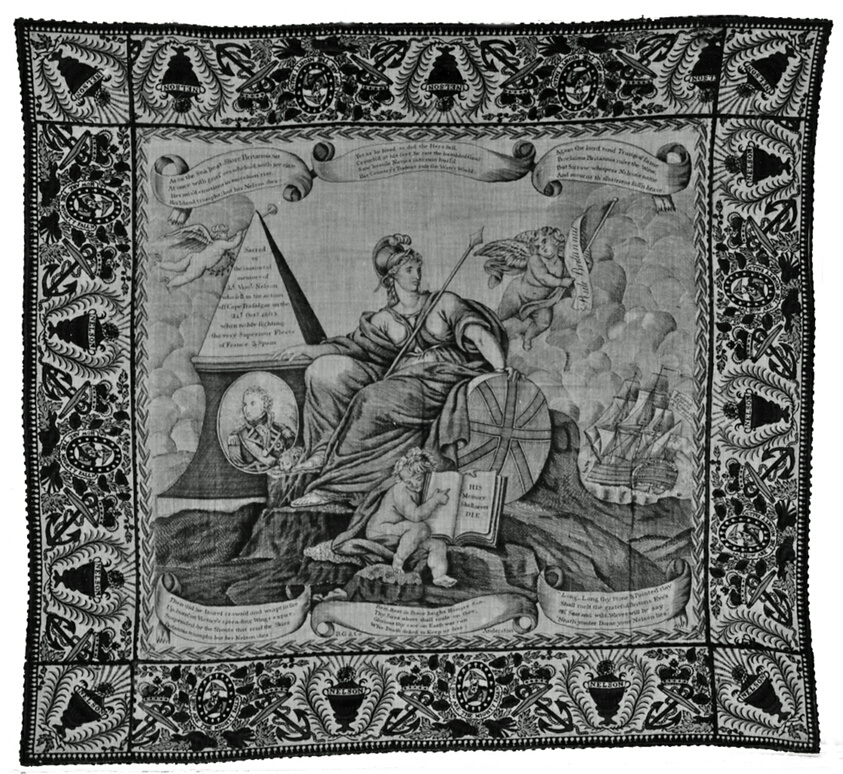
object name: Textile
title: Handkerchief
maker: Printed by R.G. Anderston and Company (Scottish, 19th century); Scotland, Printfield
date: c. 1805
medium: Cotton; printed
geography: Scotland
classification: textile; weaving - printed; accessories (object genre)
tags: propaganda